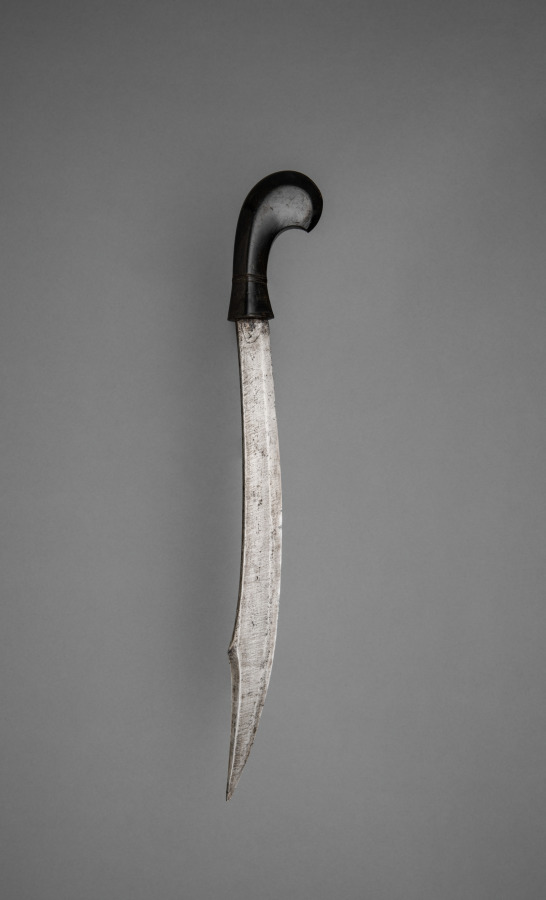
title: Dagger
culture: Indonesia, Sulawesi (Celebes)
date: before 1916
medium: metal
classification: Arms and Armor